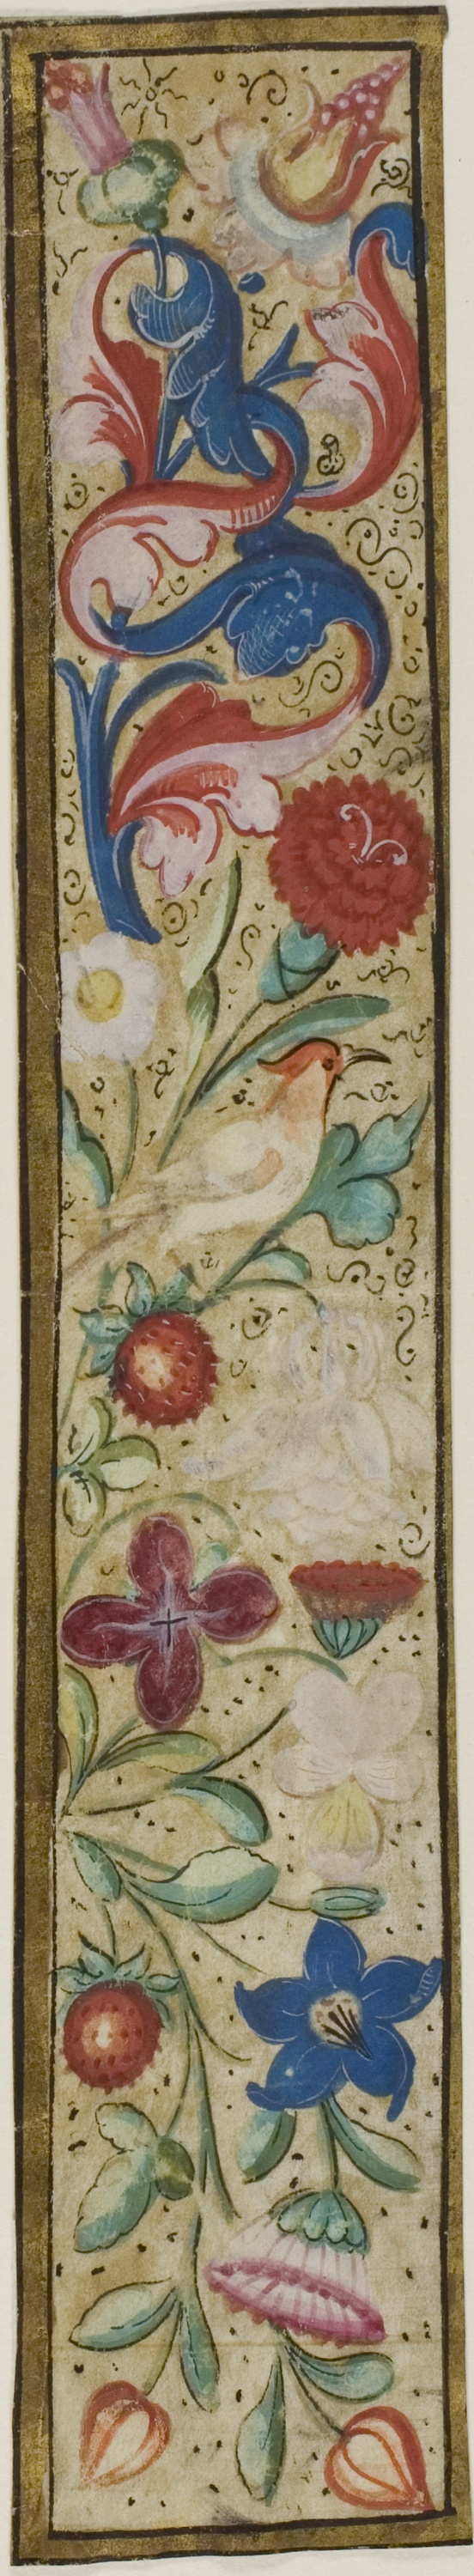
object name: Drawing and Watercolor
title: Illuminated Border with Bird, Strawberries and Flowers from a Choir Book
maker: European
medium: Manuscript cutting in tempera, colored inks and gold leaf on vellum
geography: Europe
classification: tempera; drawings (visual works); prints and drawing